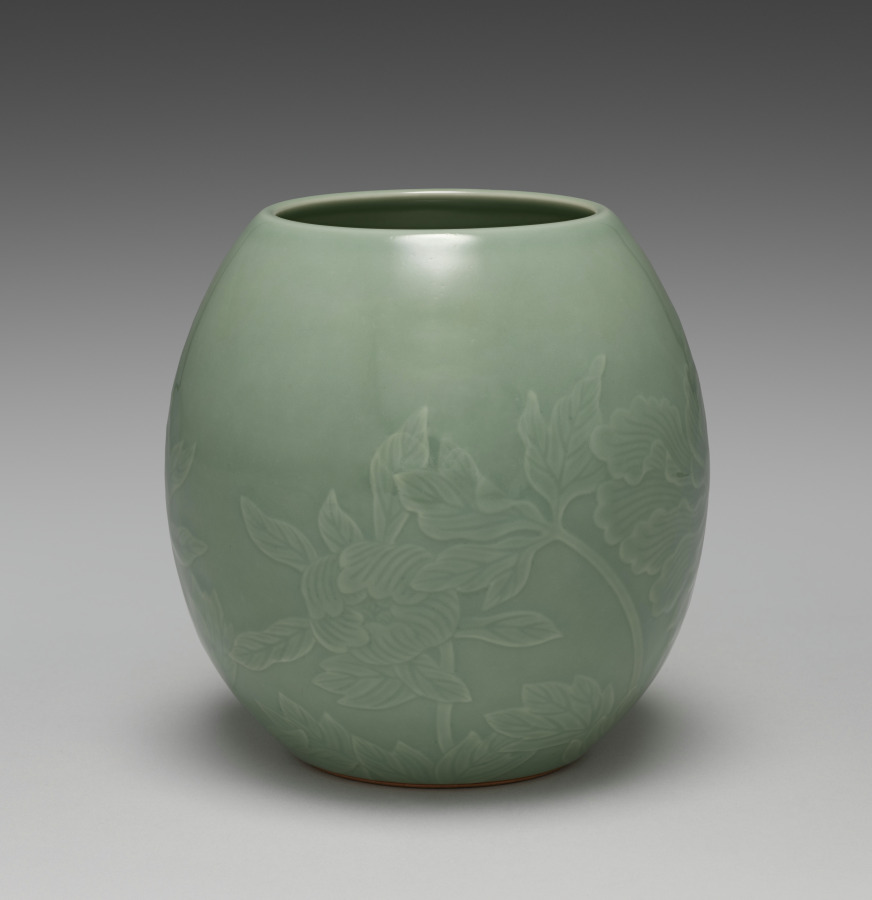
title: Water Container with Peonies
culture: Japan, Meiji period (1868–1912)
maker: Seifū Yohei III (Japanese, 1851–1914)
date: 1900–1914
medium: Porcelain with molded and carved design, green glaze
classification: Ceramic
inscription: 清風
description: This ceramic is an especially accomplished example of Yohei III’s combination of an all-over translucent colored glaze with molded and carved designs. It features the peony as its primary motif. The water container, or mizusashi, has a green glaze, and its design takes into consideration the rounded shape and the seated position of the host and guests. It begins low on the body with a flower just beginning to open and continues with another flower a bit higher up, with its petals fully extended and beginning to open outward. It finishes with a flower in full bloom, petals and leaves unfurled and spread outward from the center, now occupying almost the entire surface. The water container once belonged to the Hosokawa family, whose go-between corresponded with Yohei IV about the piece. Yohei IV thanked them for their payment and requested that despite his father’s death in the previous year, they continue to favor the studio with their orders. The letter and its envelope, as well as an auction tag, remain with the object.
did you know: Yohei III often made chanoyu pieces for select clients, as documented by letters still preserved with this water container, or mizusashi.